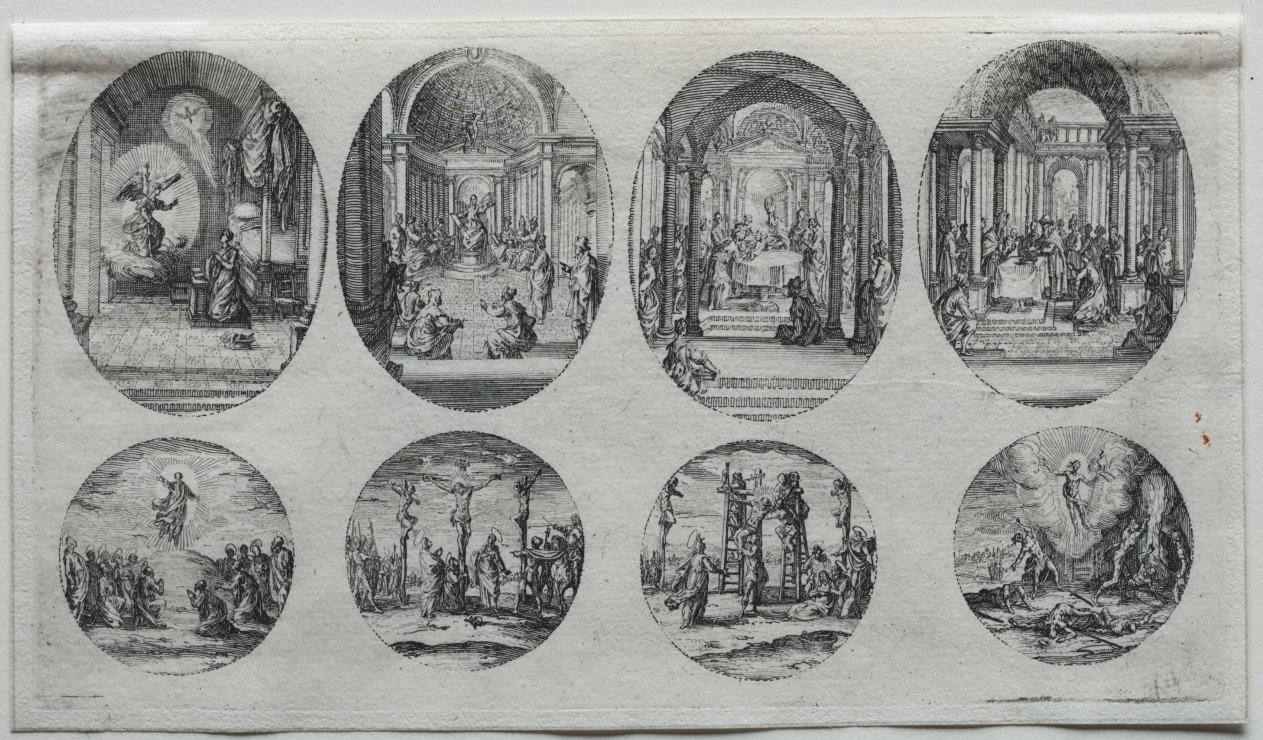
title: The Mysteries of the Passion: The Resurrection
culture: France, 17th century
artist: Jacques Callot (French, 1592–1635)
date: 1631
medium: etching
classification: Print